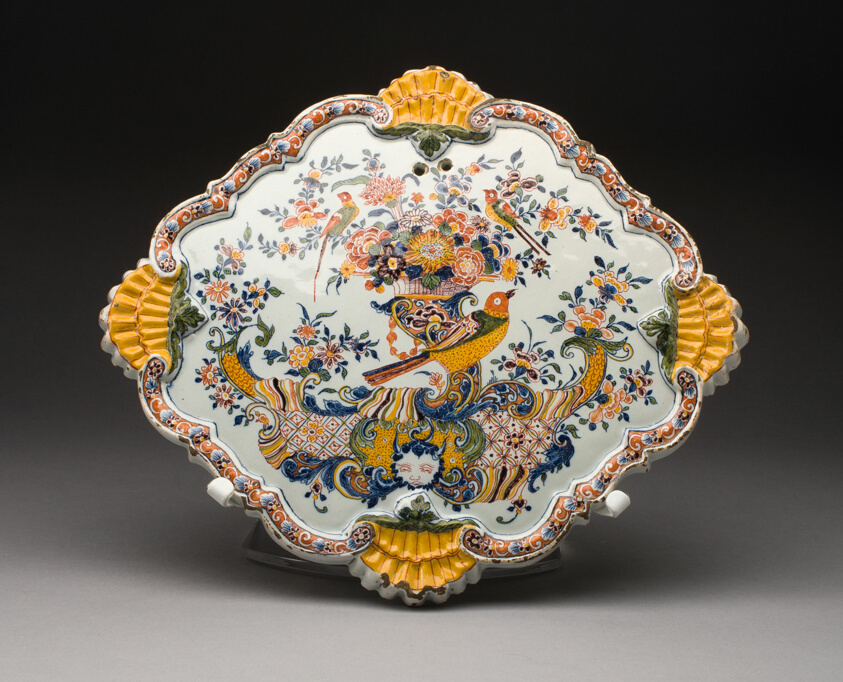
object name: Ceramics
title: Plaque (one of a pair)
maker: Delft, Netherlands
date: c. 1750/60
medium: Tin-glazed earthenware (Delftware) with polychrome decoration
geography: Delft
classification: earthenware; european decorative arts; ceramics